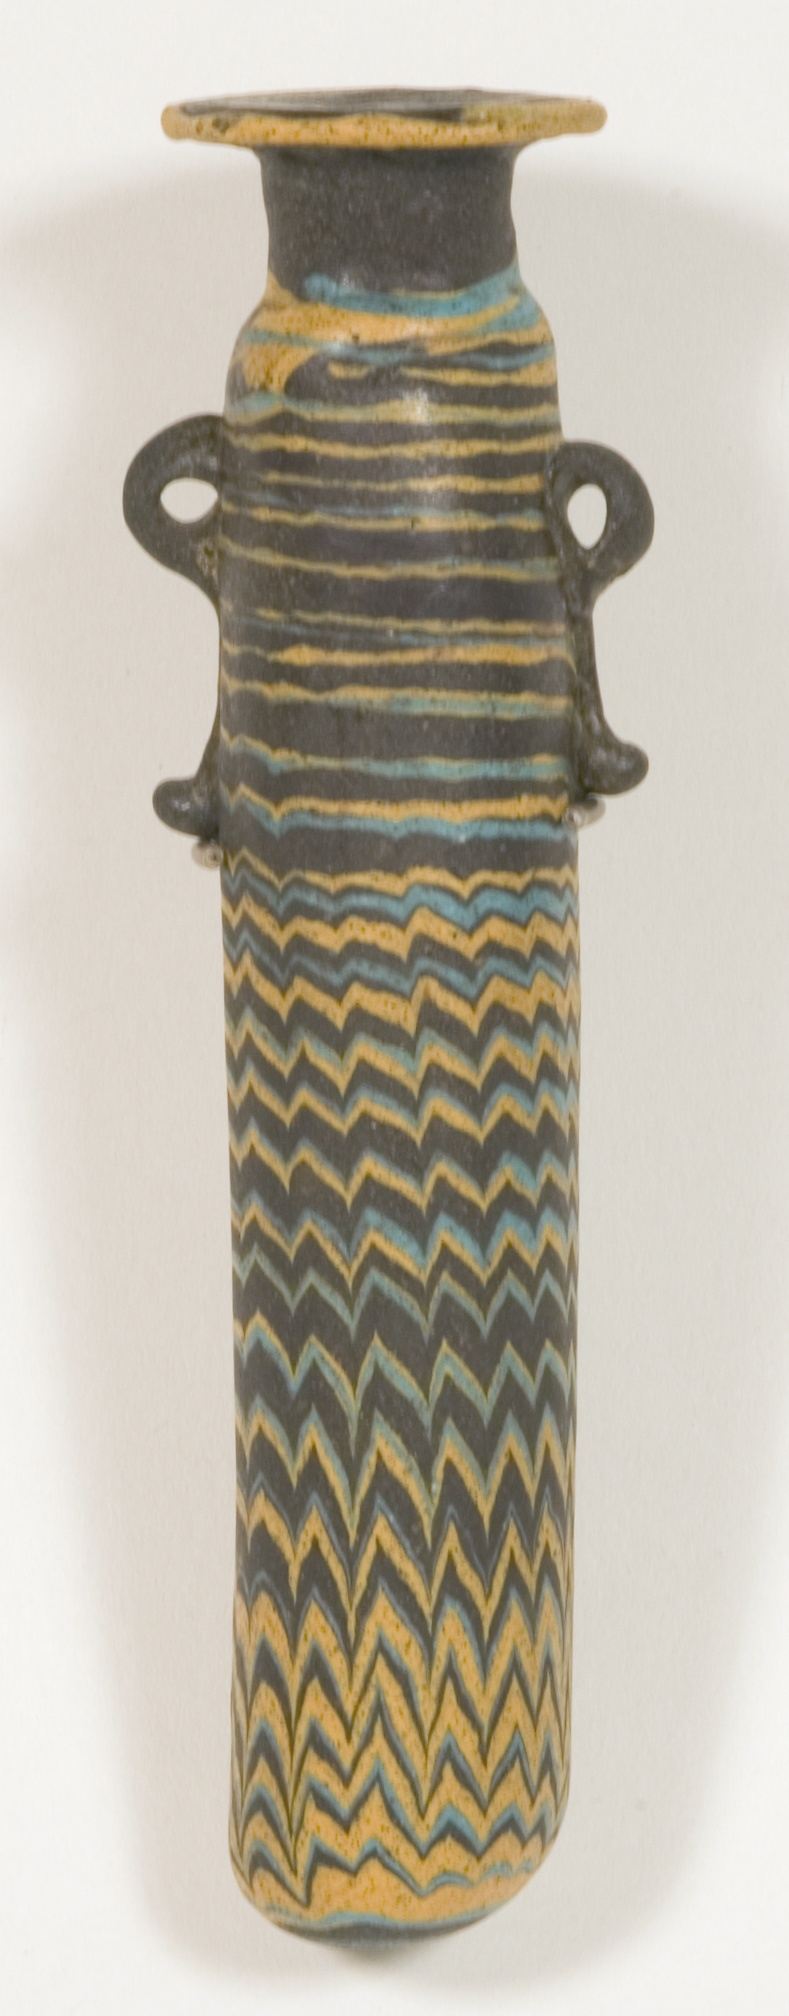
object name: Vessel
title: Alabastron (Container for Scented Oil)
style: ancient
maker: Eastern Mediterranean, possibly from Rhodes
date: late 6th-5th century BCE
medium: Glass, core-formed technique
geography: Ródhos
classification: container; alabastron; glass; vessel; ancient art